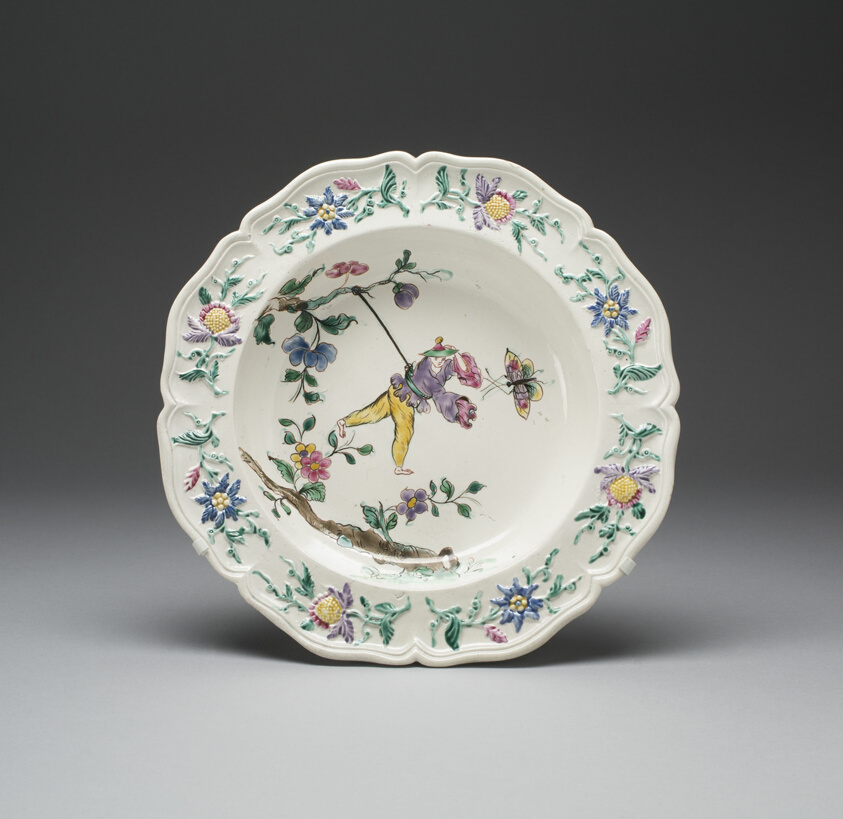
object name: Ceramics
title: Soup Plate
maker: England, Staffordshire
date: c. 1760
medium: Salt-glazed stoneware with polychrome enamel decoration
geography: Staffordshire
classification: plate (general, dish); tableware; dish (vessel); salt-glazed stoneware; ceramics; stoneware; european decorative arts